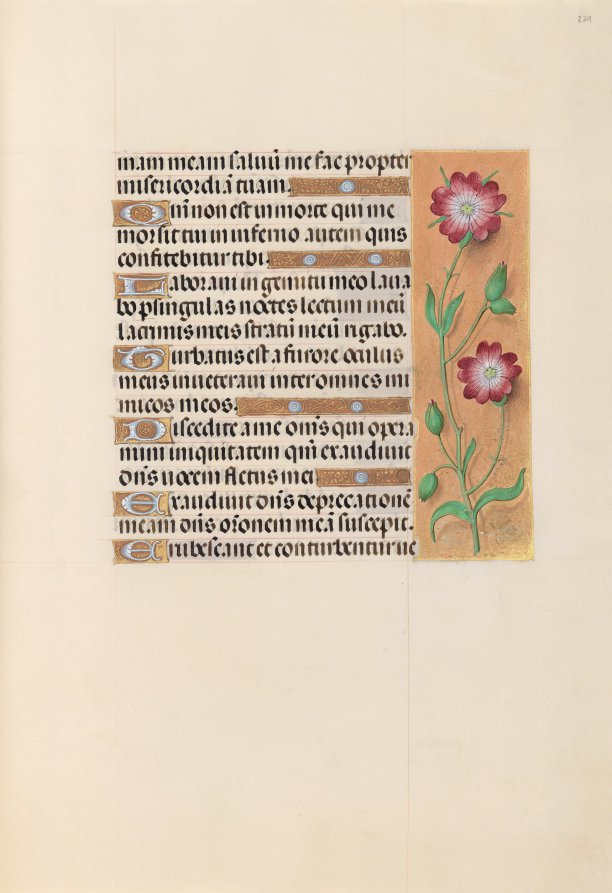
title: Hours of Queen Isabella the Catholic, Queen of Spain: Fol. 229r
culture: Flanders, Ghent and Bruges, late 15th century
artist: Master of the First Prayerbook of Maximillian (Flemish, c. 1444–1519)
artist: and Associates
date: c. 1500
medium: ink, tempera, and gold on vellum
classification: Bound Volume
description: This manuscript was illuminated by a circle of at least five highly organized manuscript painters active in the Flemish cities of Ghent and Bruges. The principal illuminator was Alexander Bening, who painted the majority of the book's miniatures. Manuscripts produced by this circle of artists are renowned for the decoration of their borders, which typically feature a rich variety of realistically-painted flowers, birds, and butterflies. This prayer book, called a book of hours, was intended not for a cleric, but for the private devotions of a lay person-in this case, Isabella the Catholic, Queen of Spain (1451-1504). Isabella's coat of arms embellishes the book's frontispiece. It is unlikely that the book was commissioned by the Queen herself; rather, she probably received it as a diplomatic gift from someone courting her patronage, perhaps Cardinal Francisco Jimenez de Cisneros. A Franciscan friar, Jimenez was dependent upon Isabella for his advancement, first to the post of Queen's confessor in 1492, and then to Archbishop of Toledo in 1495.